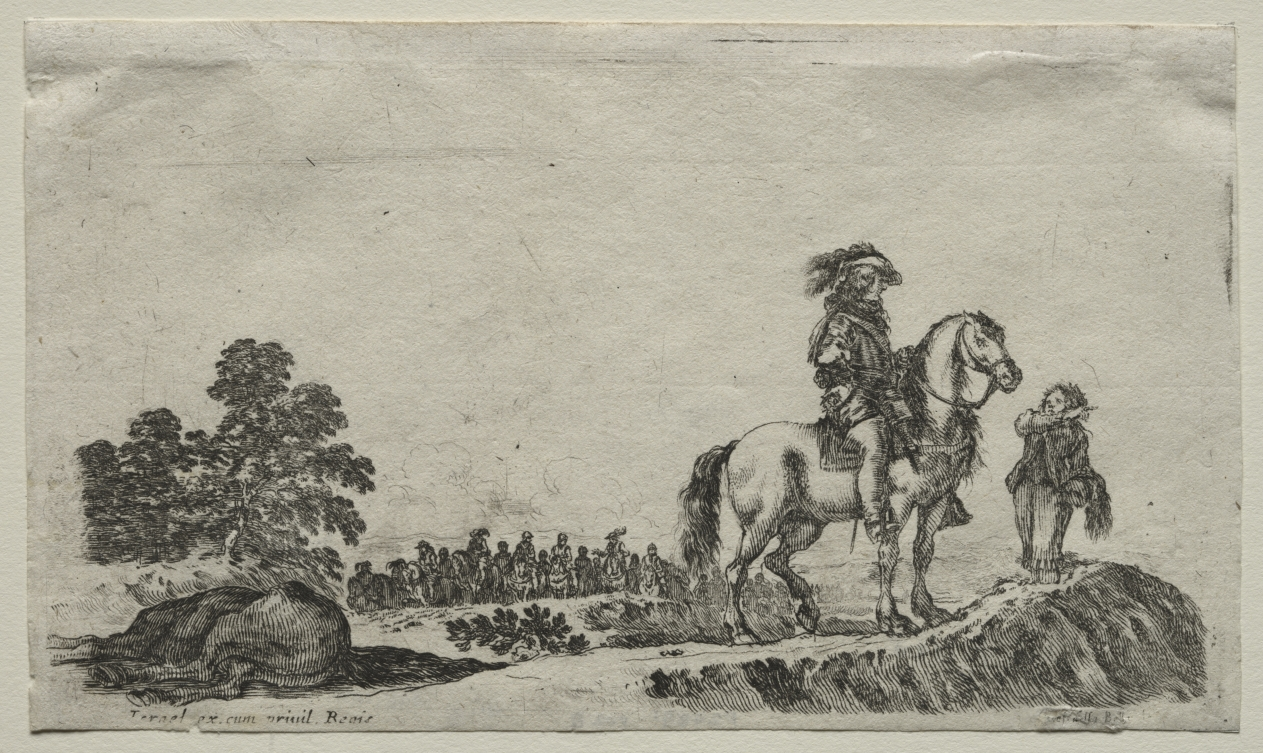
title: Various Figures and Landscapes: A Lost Horseman Enquiring the Way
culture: Italy, 17th century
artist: Stefano Della Bella (Italian, 1610–1664)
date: 1649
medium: etching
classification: Print